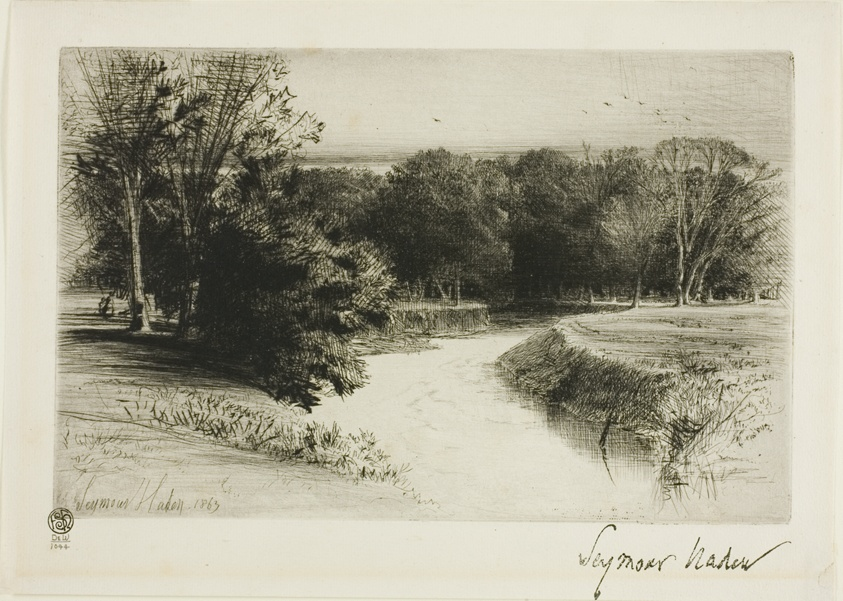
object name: Print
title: A Sunset in Ireland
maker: Francis Seymour Haden (English, 1818-1910)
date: 1863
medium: Etching and drypoint on ivory laid paper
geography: England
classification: etching; print; prints and drawing